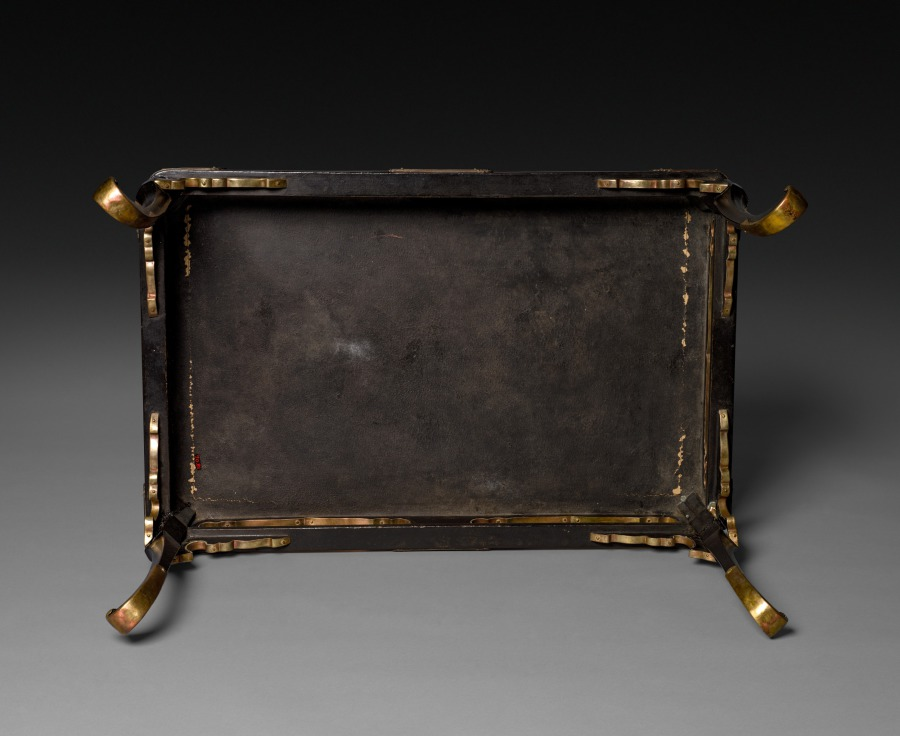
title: Table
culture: Japan, Muromachi period (1392–1573)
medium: wood with lacquer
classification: Lacquer